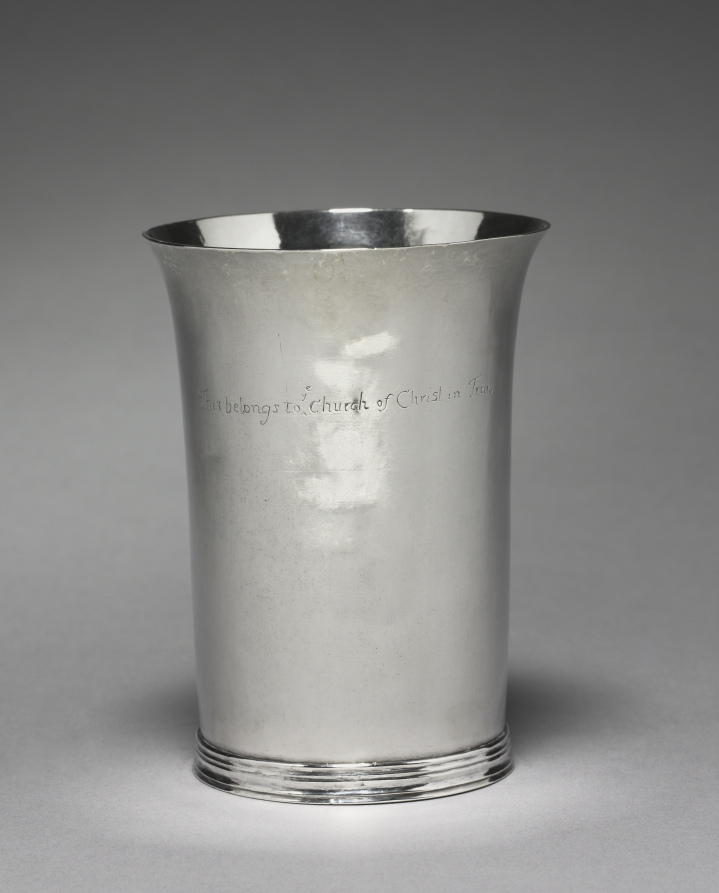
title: Beaker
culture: America, Massachusetts, Barnstable, 18th century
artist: Moody Russell (American, 1694–1761)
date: c. 1715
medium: silver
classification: Silver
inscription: engraved: "This belongs to ye Church of Christ in Truro," in semiscript on side.